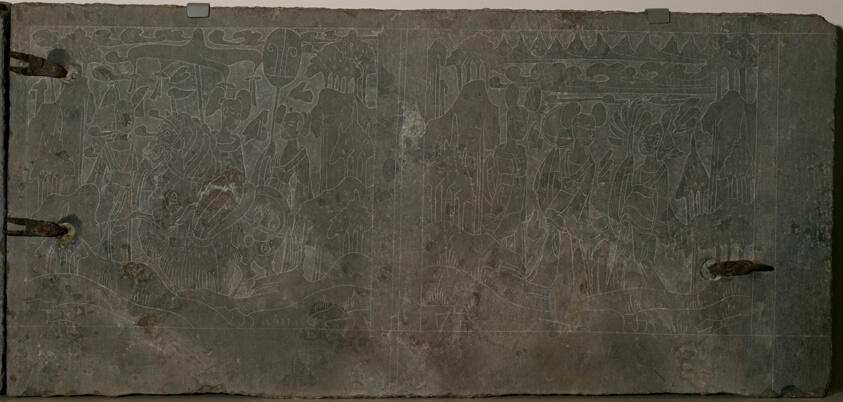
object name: Religious/Ritual Object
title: Panels from a Funerary Couch (Guanchuang)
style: Chinese (culture or style)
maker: China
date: Northern Wei dynasty (386–535); c. 525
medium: Limestone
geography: China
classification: stone; sculpture; asian art; ritual objects